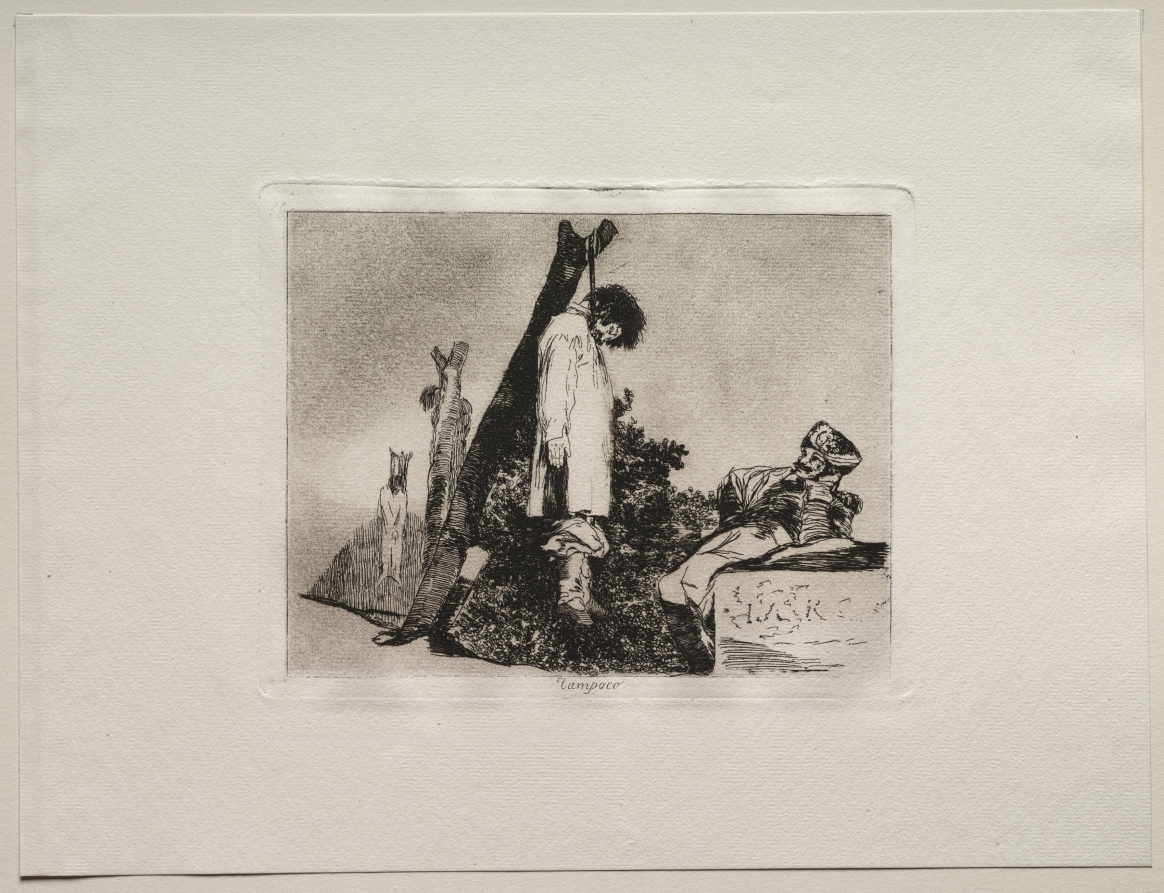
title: The Horrors of War: Not ( In This Case) Either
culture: Spain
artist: Francisco de Goya (Spanish, 1746–1828)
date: c. 1810–20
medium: etching and aquatint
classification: Print